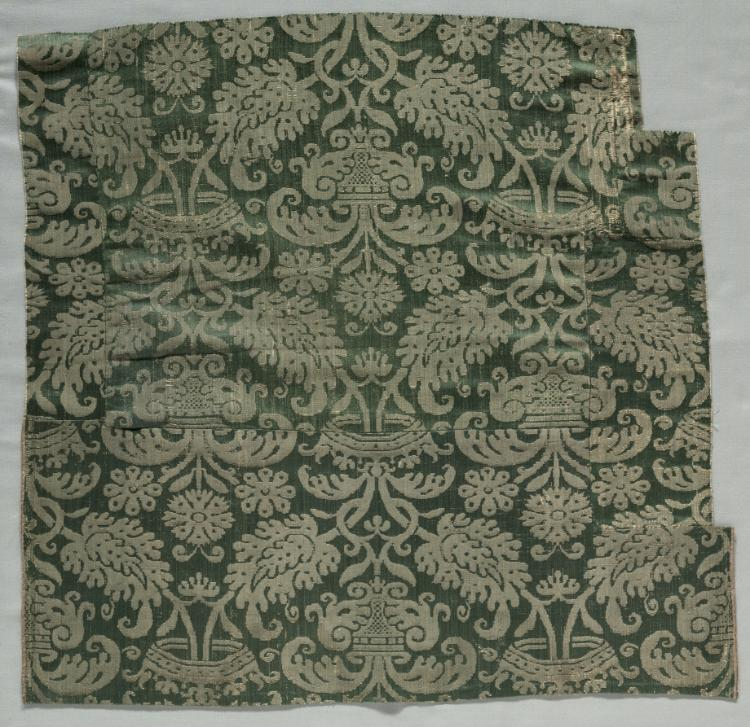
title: Two Lengths of Textile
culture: Italy or Spain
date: 1500s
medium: damask, silk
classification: Textile